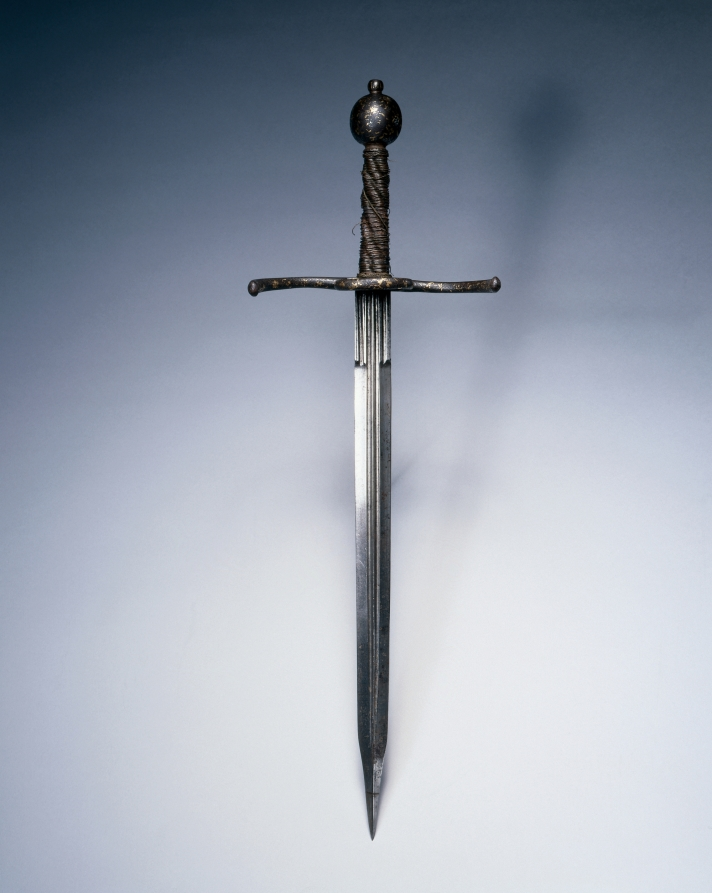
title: Dagger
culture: Italy, 16th century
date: c. 1550–1600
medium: steel; russetted and damascened guard and pommel; wood and wire grip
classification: Arms and Armor